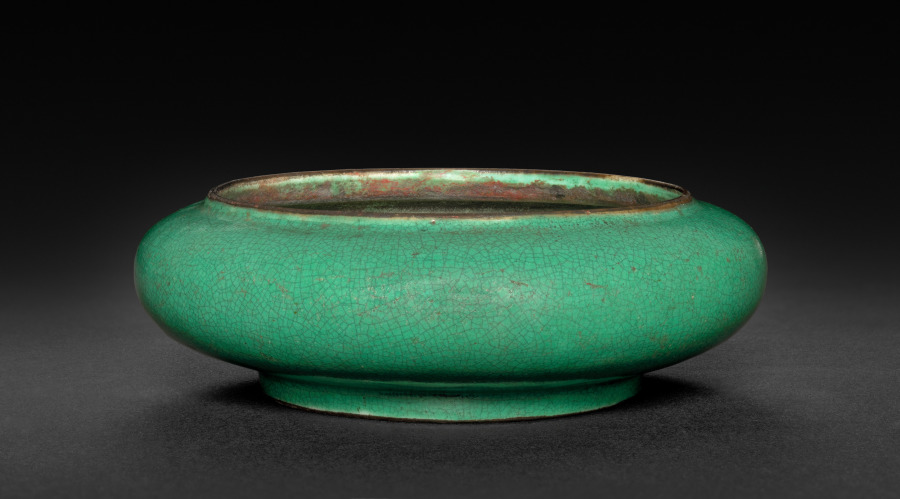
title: Flattened Globular Bowl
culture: China, Qing dynasty (1644-1911), Kangxi reign (1661-1722)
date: 1661–1722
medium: porcelain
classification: Ceramic